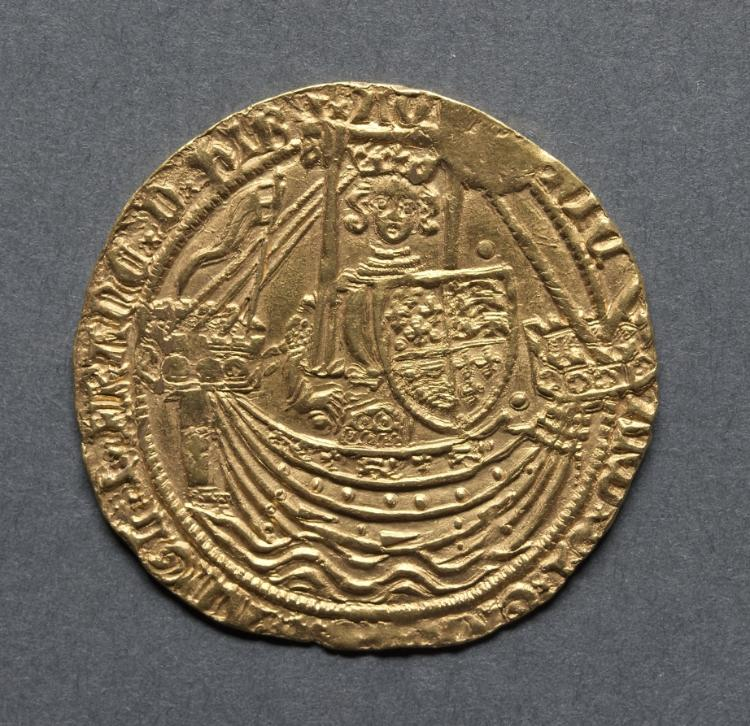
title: Noble: Richard II Standing on Ship with Shield of Arms (obverse)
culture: England, Richard II, 1377-1399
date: 1377–1399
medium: gold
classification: Coins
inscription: RICARD DI GRA REX ANGLE Z FRANC D HIB Z AQ